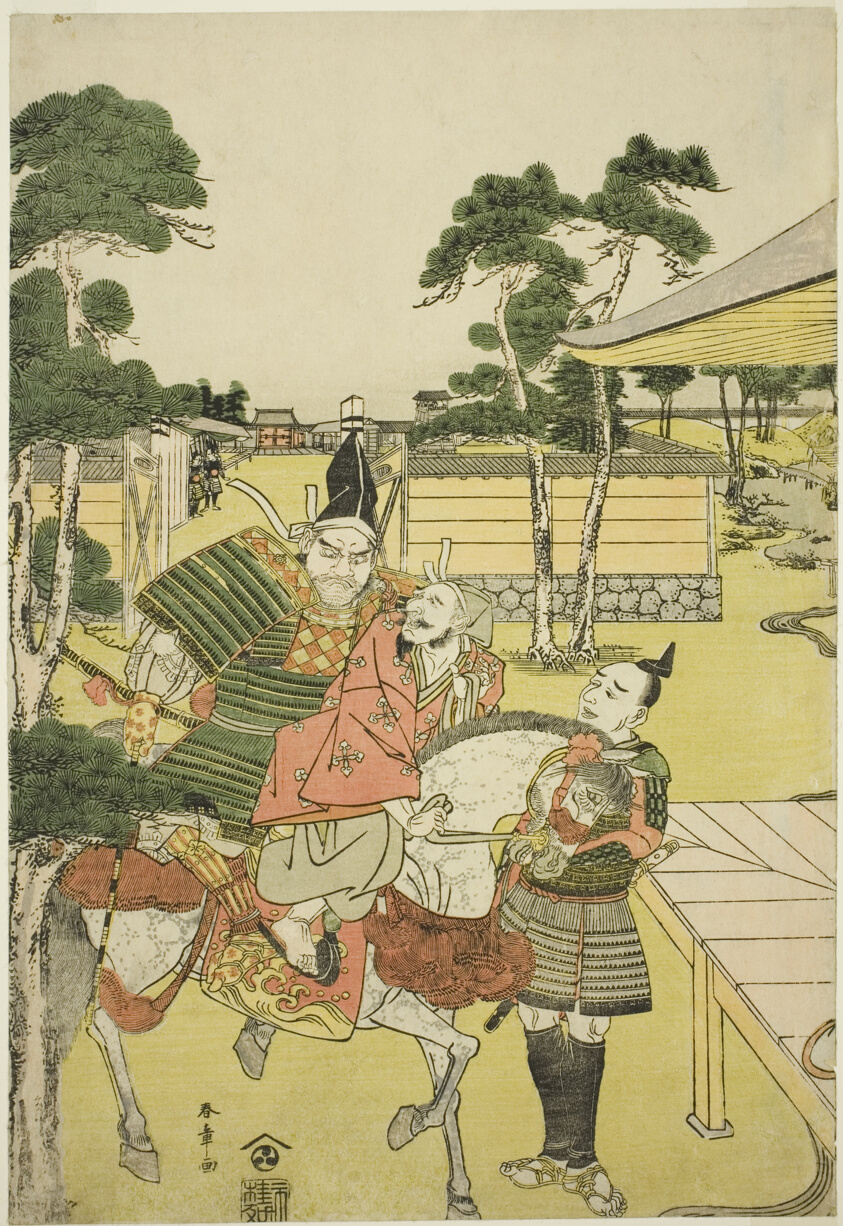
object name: Print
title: Musashibô Benkei Brings the Captured Tosabô Shôshun to Yoshitsune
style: Japanese (culture or style)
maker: Katsukawa Shunshô 勝川 春章; Japanese, 1726-1792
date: About 1782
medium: Color woodblock print; ôban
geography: Japan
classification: woodblock print; print; asian art